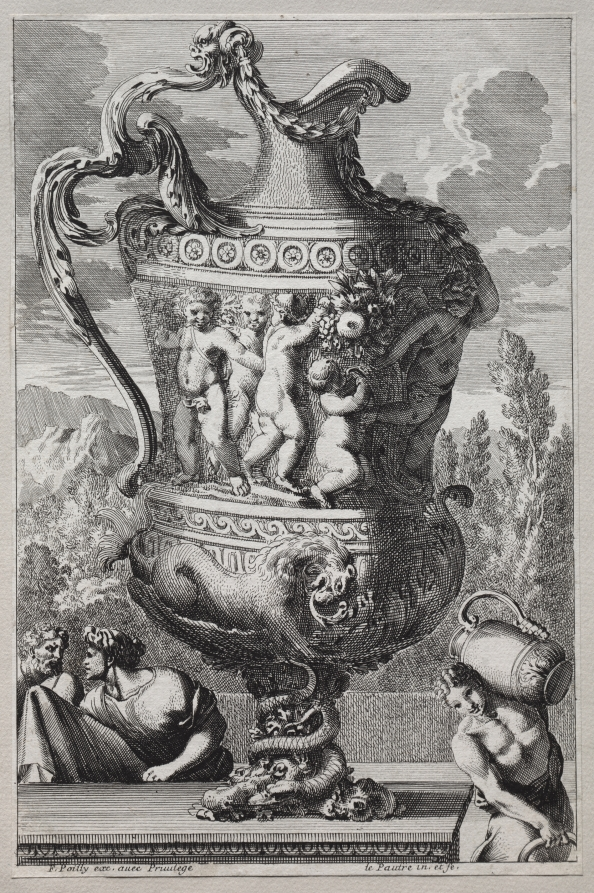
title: Decorative Urn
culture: France, 17th century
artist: Jean Le Pautre (French, 1618–1682)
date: 1600s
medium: etching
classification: Print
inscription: inscribed, lower left, in plate: F. Poilly exc. avec Privilege; inscribed, lower right, in plate: le Pautre in. et fe.